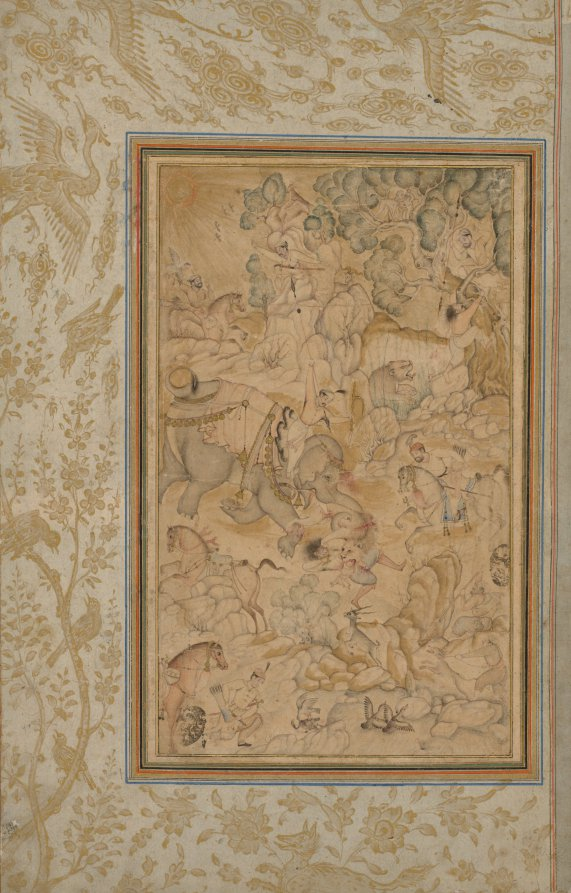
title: Princes hunting in a rocky landscape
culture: India, Mughal, 16th century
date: c. 1580–85; borders added c. 1700s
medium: Ink, slight color, and gold on paper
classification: Painting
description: The subdued palette of this tinted drawing belies the dire events of the scene. A group of Mughal nobles out hunting with falcons has chanced upon two lions in the wilderness, and one of the men has been attacked. The bearded figure with the falcon at the upper left and the huntsman about to retrieve a duck caught by one of the trained falcons at the lower left are reminiscent of an earlier work, Hunting with Falcons in a Landscape (CMA 2013.292), painted by a Persian artist. By the time this painting was made Akbar exerted more direct influence on his artists’ work, and it reveals his taste for dramatic action and climactic moments where life and death hang in the balance.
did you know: A hunter with gunpowder pouch hurriedly loads a musket with a scouring stick.